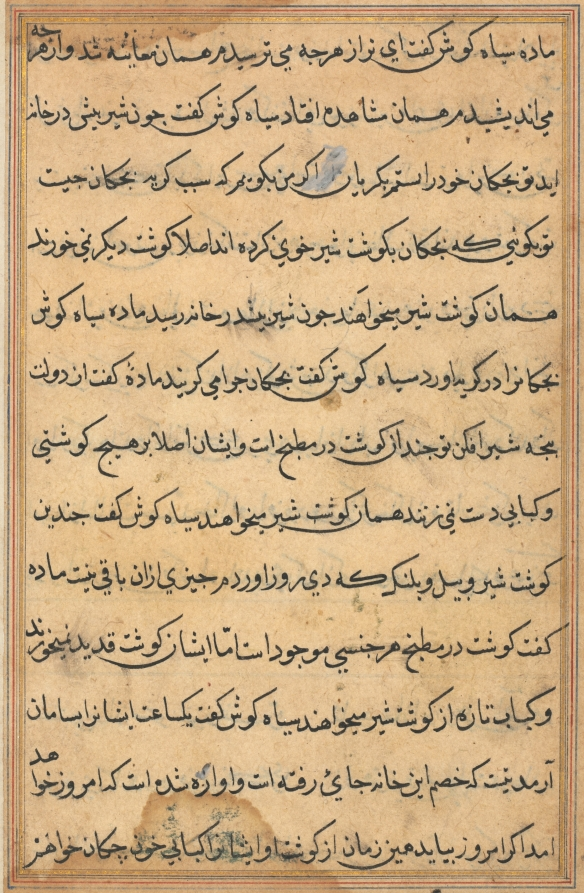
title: Page from Tales of a Parrot (Tuti-nama): text page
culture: Mughal India, court of Akbar (reigned 1556–1605)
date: c. 1560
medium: gum tempera, ink, and gold on paper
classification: Painting